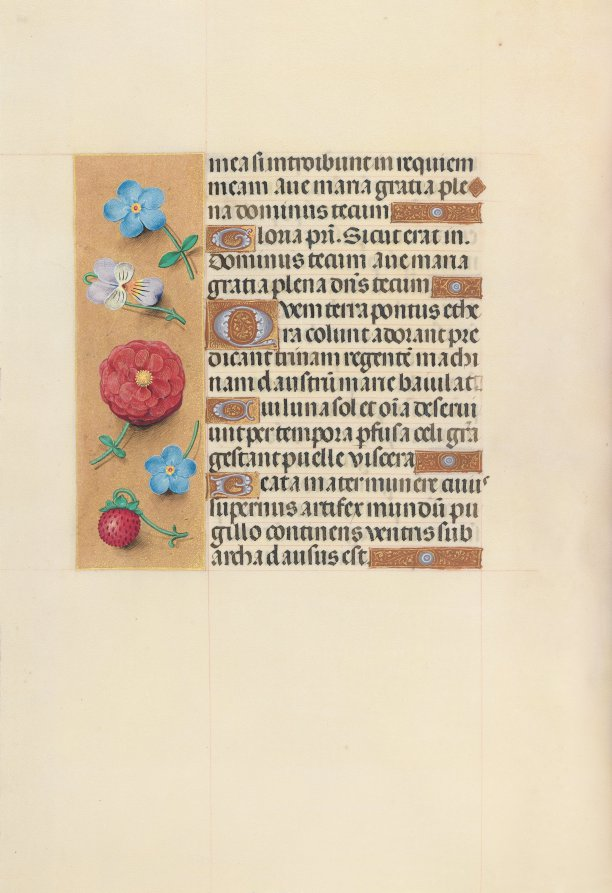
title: Hours of Queen Isabella the Catholic, Queen of Spain: Fol. 99v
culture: Flanders, Ghent and Bruges, late 15th century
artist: Master of the First Prayerbook of Maximillian (Flemish, c. 1444–1519)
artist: and Associates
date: c. 1500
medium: ink, tempera, and gold on vellum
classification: Bound Volume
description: This manuscript was illuminated by a circle of at least five highly organized manuscript painters active in the Flemish cities of Ghent and Bruges. The principal illuminator was Alexander Bening, who painted the majority of the book's miniatures. Manuscripts produced by this circle of artists are renowned for the decoration of their borders, which typically feature a rich variety of realistically-painted flowers, birds, and butterflies. This prayer book, called a book of hours, was intended not for a cleric, but for the private devotions of a lay person-in this case, Isabella the Catholic, Queen of Spain (1451-1504). Isabella's coat of arms embellishes the book's frontispiece. It is unlikely that the book was commissioned by the Queen herself; rather, she probably received it as a diplomatic gift from someone courting her patronage, perhaps Cardinal Francisco Jimenez de Cisneros. A Franciscan friar, Jimenez was dependent upon Isabella for his advancement, first to the post of Queen's confessor in 1492, and then to Archbishop of Toledo in 1495.